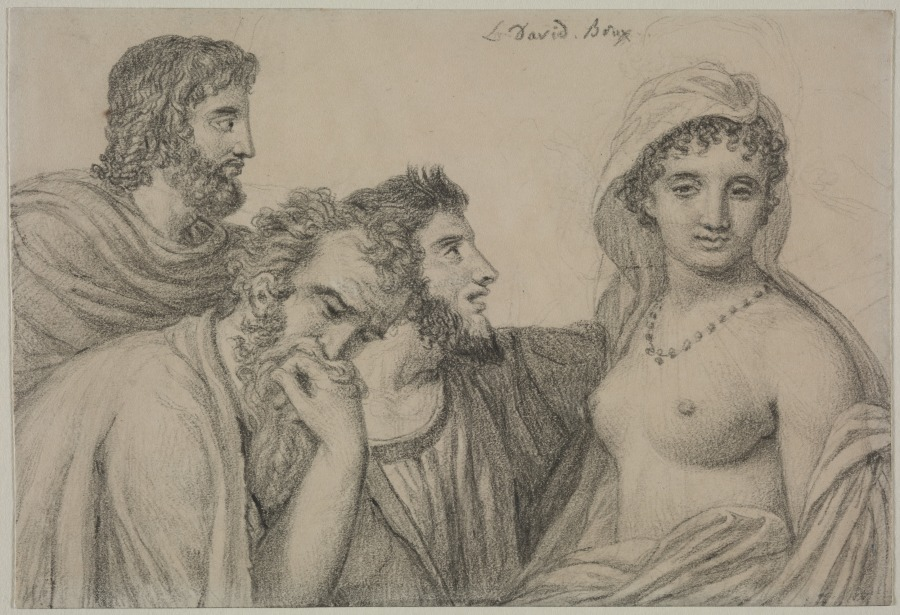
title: Phryne before Her Judges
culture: France, 19th century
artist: Jacques-Louis David (French, 1748–1825)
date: c. 1816–20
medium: black chalk on wove paper discolored to beige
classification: Drawing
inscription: inscribed, upper right, in black chalk: L. David Brux.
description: Known in his own time for large-scale paintings on historical subjects, Jacques-Louis David drew avidly to plan his compositions. Late in life, however, his use of drawing changed dramatically, resulting in works such as this pair. After falling out of political favor during the French Revolution (1789–99), David moved to Brussels in exile. There, he crafted small, enigmatic drawings of close-up figures. Phryne features a mythological courtesan charged with blasphemy, while The Prisoner is vaguer, with an unidentifiable man grimacing alongside a chain and oil lamp. David embraced this uncertainty, writing at the time that “I just threw down . . . the mad ideas that came into my head.”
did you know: The two male figures at center may be têtes d’expression, which convey emotion through pose and expression.